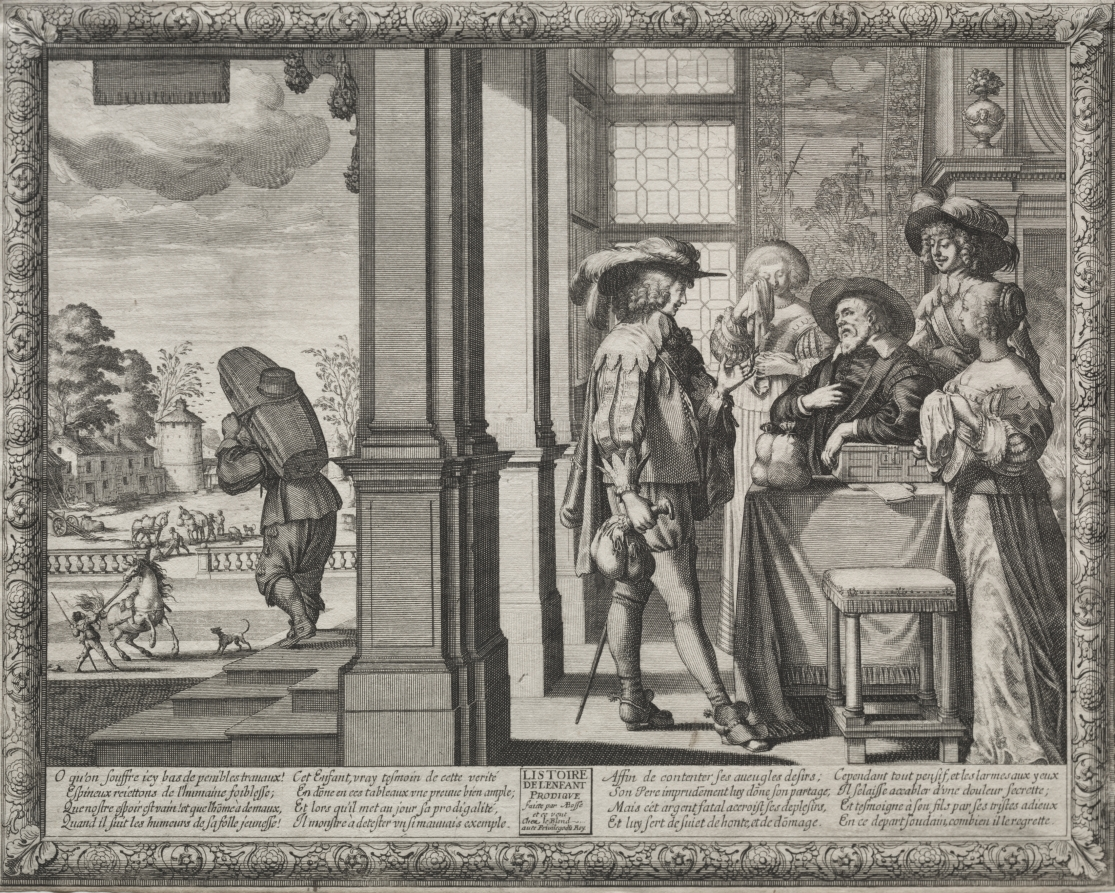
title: The Prodigal Son: The Prodigal Bidding His Parents Farewell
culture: France, 17th century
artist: Abraham Bosse (French, 1602–1676)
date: 1635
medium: etching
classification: Print